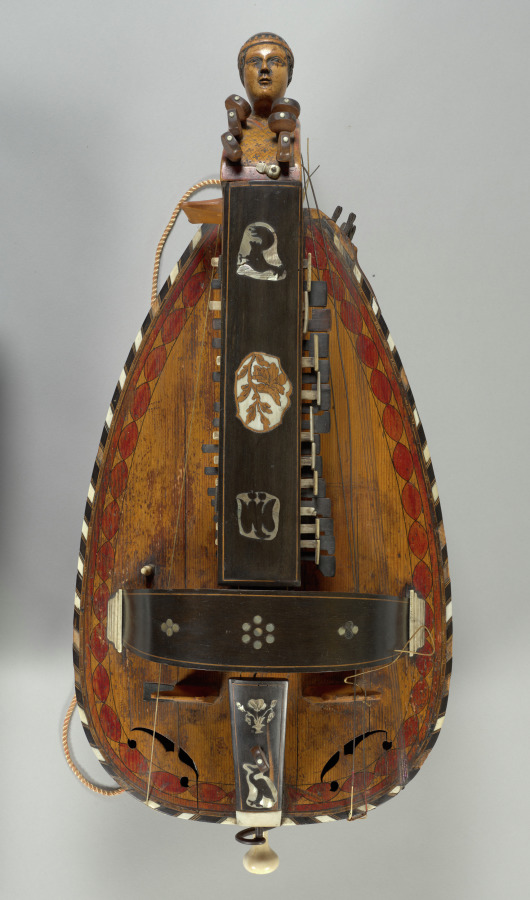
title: Vielle à Roue (Hurdy-Gurdy)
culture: France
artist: Jacques Decante (French, 1808–1884)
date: 1865–70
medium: Wood; mother-of-pearl inlay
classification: Musical Instrument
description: In France, the hurdy-gurdy is known as the vielle à roue (wheel fiddle). This six-stringed musical instrument produces sound by a hand crank-turned wheel that rubs against the strings. The wheel functions much like a violin bow, and single notes sound similar to those of a violin. Melodies are played on a keyboard that presses small wedges against the strings to change their pitch.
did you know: This vielle à roue was made in the French village of Jenzat, which was the manufacturing center for hurdy-gurdies during the 19th century.